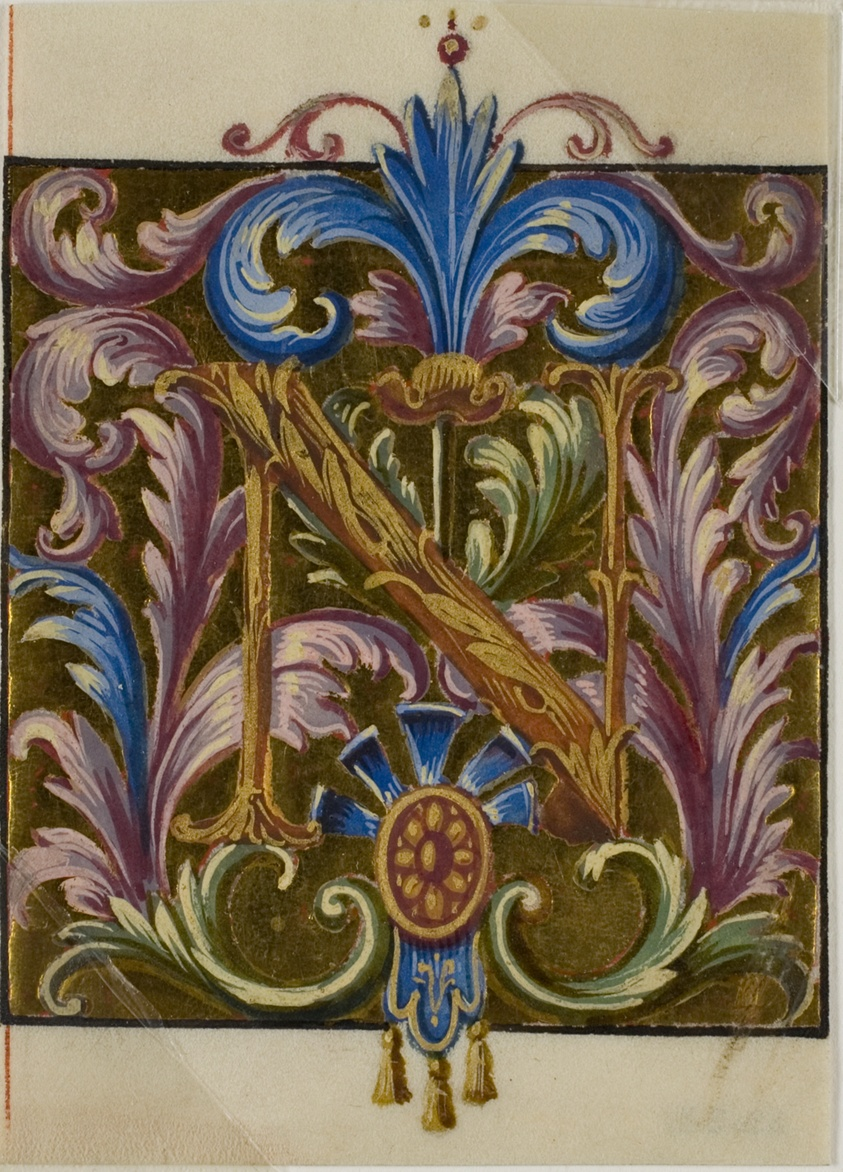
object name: Drawing and Watercolor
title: Illuminated Initial "N" with Acanthus Leaves from a Choirbook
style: medieval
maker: European (possibly France)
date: 18th or 19th century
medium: Manuscript cutting in tempera, gold leaf and gold paint on vellum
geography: Europe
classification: drawings (visual works); manuscript; prints and drawing